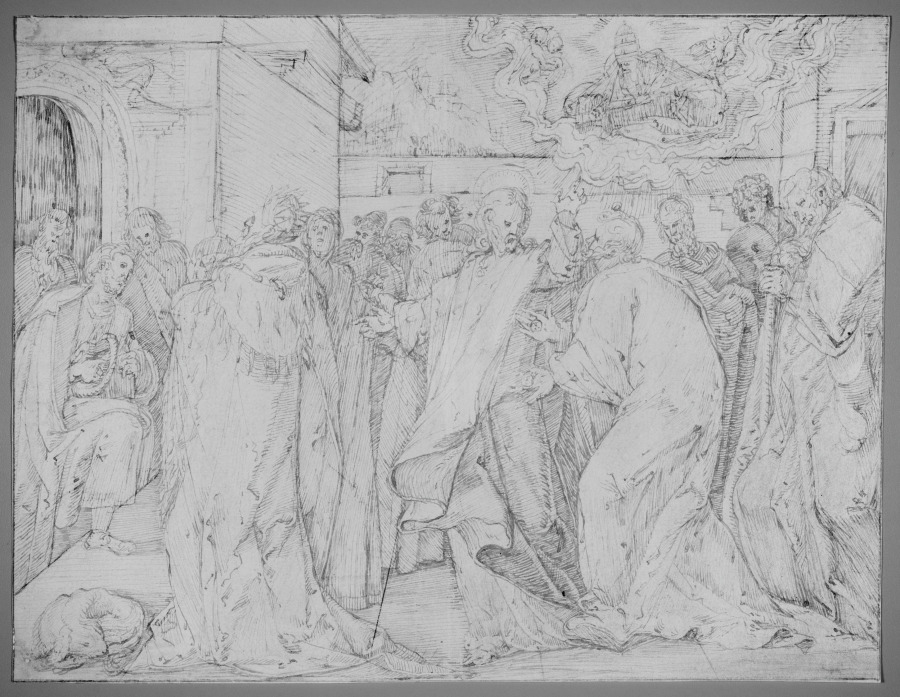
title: The Parable of the Tribute Money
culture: Netherlands, late 16th Century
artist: Master of the Egmont Albums (Netherlandish, 1480-1620)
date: c. 1580–1600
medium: Pen and brown ink, traces of pen and black ink and black chalk, on paper; framing lines in brown ink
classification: Drawing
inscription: falsely signed, lower right, in brown ink: Hans van Aken fecit. [abraded, visible under UV] ; VERSO, right center, in graphite: 259 ; lower left, in graphite: 641 M. 244 / (1V7) ; lower left, in graphite: PMG ; lower right, in graphite: 2063 [circled] ; lower right, in graphite: [illegible] [partially erased] ; lower right, in graphite: [illegible] [partially erased] ; lower right, in graphite: 239. ; lower right, in graphite: 53 [crossed out]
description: The New Testament parable of the tribute money addresses the division between worldly and divine power. Here, the artist depicted Christ in the center of a civic square with one hand pointing toward a king wearing a crown and an ermine robe and the other toward God above. Encouraged by Christ’s words to show each authority its due, the crowd shows deference to both the king and God via facial expression, pose, and gesture. Parables were enduringly popular on prints, stained glass, and decorative objects for their relevance to the issues and choices made by everyday citizens.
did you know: The pose of the kneeling man and the decoration of the door surround in this drawing are both based on details in a woodcut made earlier in the century by the German artist Albrecht Dürer.